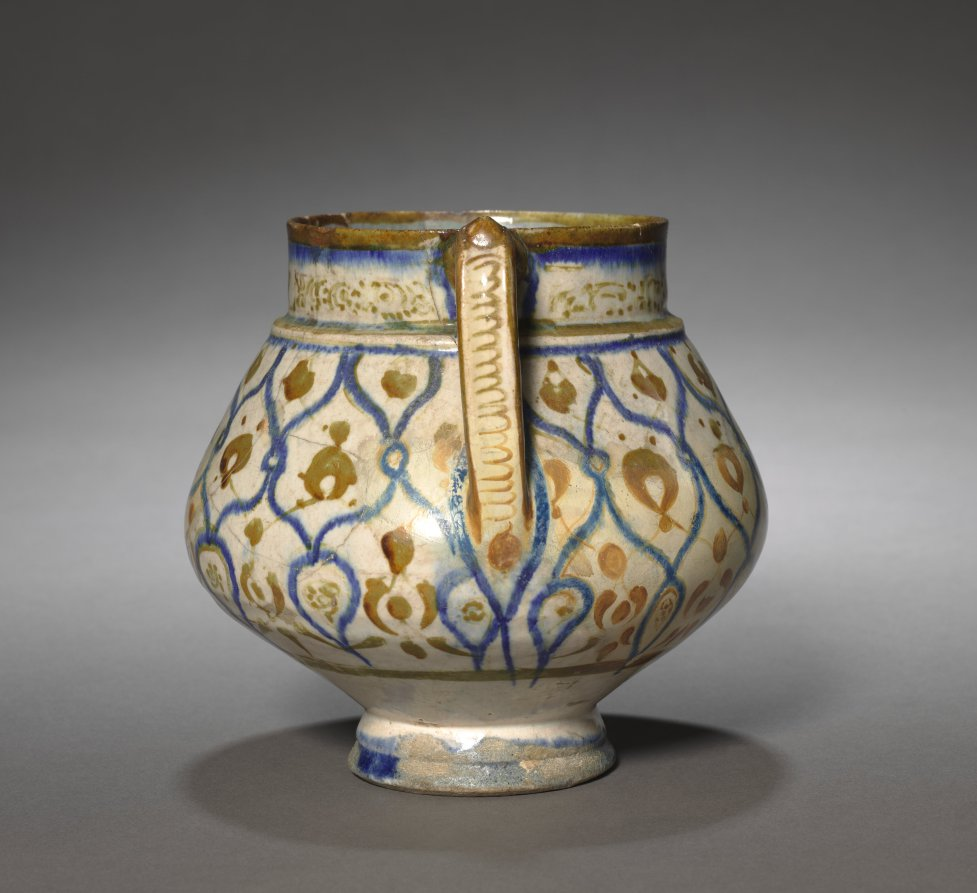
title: Jug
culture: Iran, Kashan, Seljuq period of Iran (1037–1194)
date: 1170–1220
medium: fritware with luster-painted design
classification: Ceramic